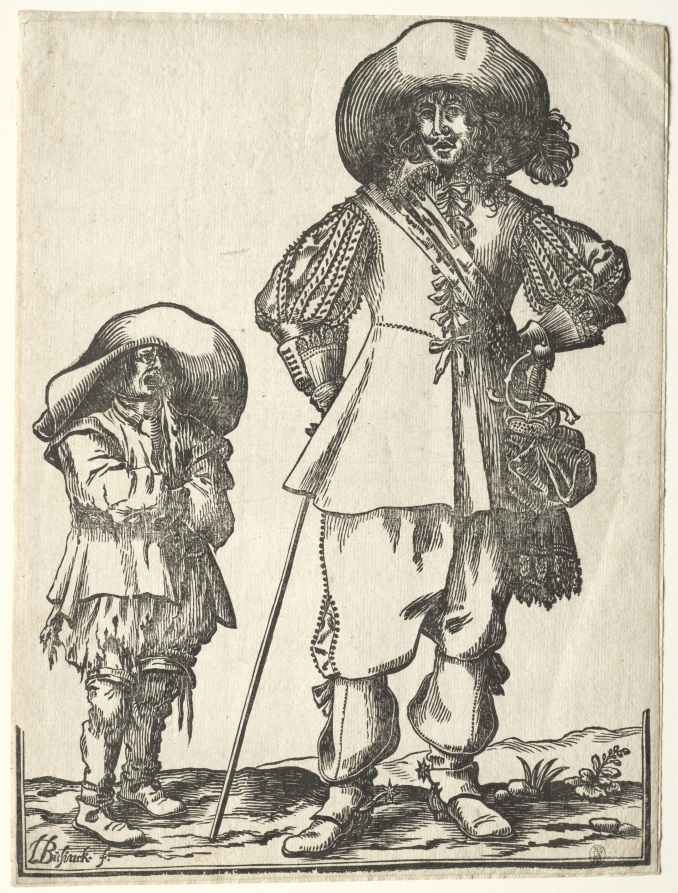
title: Standing Cavalier and Beggar Boy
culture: Germany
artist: Ludolph Büsinck (German, 1590–1669)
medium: woodcut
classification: Print